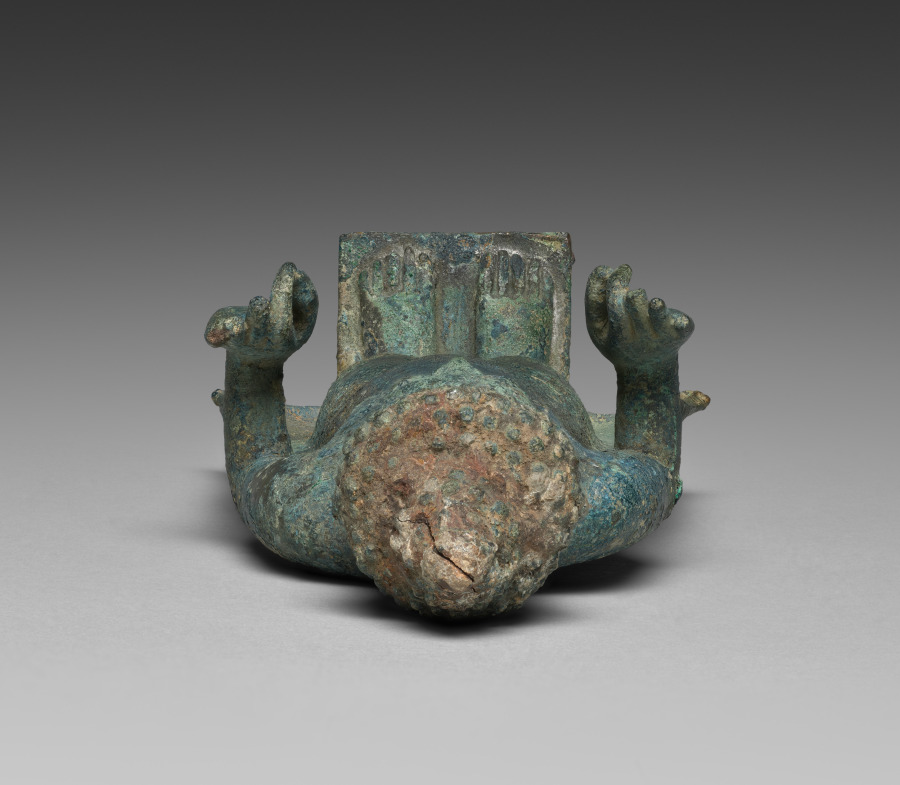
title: Buddha with Hands in Gesture of Teaching, Vitarka Mudra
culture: Thailand, Mon-Dvaravati period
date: 600s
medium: bronze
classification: Sculpture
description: Made during the early phase of Buddhist art production in mainland Southeast Asia, this Buddha wears a plain robe that indicates the artist's awareness of images made at the workshops of Sarnath, on the Ganges River in India. The hem of the lower garment, worn under the monk's robe, elegantly crosses the ankles, and the subtle line at the waist shows where it is secured.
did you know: Bronze sculptures in Thailand were made by sculpting clay around an iron armature; the clay core remains inside.